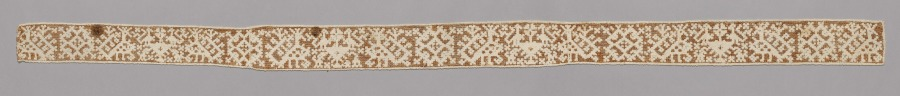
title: Lace Band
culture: Italy, Sicily, 1500s-1600s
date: 1500s-1600s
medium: Linen: needle lace (drawnwork)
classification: Lace